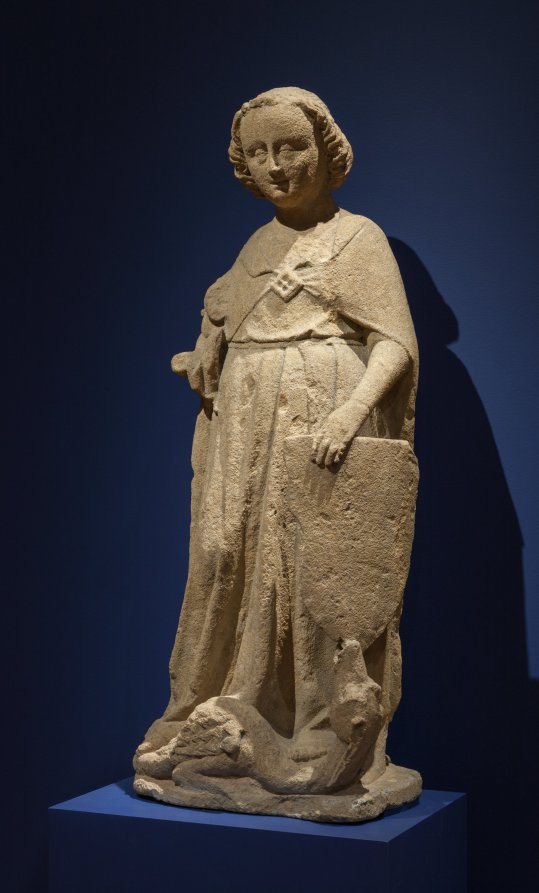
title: Saint Michael the Archangel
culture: Eastern France, Lorraine, 13th century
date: c. 1280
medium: fossiliferous limestone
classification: Sculpture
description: The Archangel Michael is shown here in his traditional role as the protector of souls who escorts the good into heaven. Though damaged, he holds the remnants of a small figure representing a human soul within his right arm. At his feet, the vanquished dragon symbolizes the saint’s defeat of evil in his struggle with the devil. This sculpture is believed to come from the cloister of the former Benedictine monastery of St.-Mihiel (dedicated to Saint Michael) in eastern France, near Verdun. Much of this abbey was destroyed during the French Revolution.